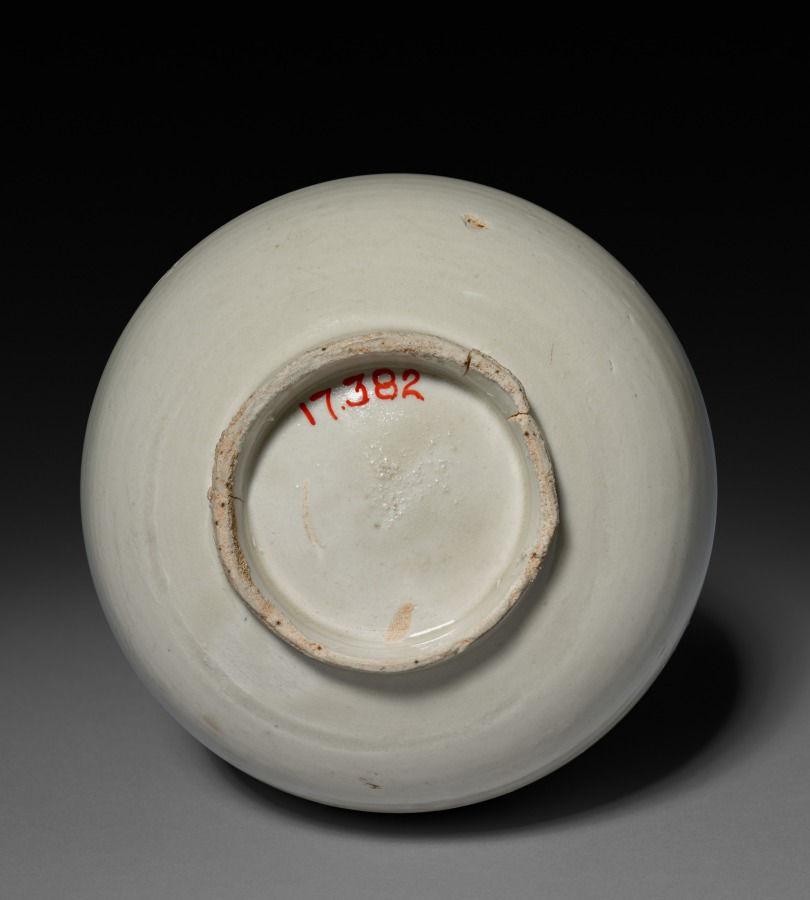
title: Bottle Vase: Ding ware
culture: China, Jin dynasty (1115-1234)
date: 12th Century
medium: glazed white porcelain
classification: Ceramic